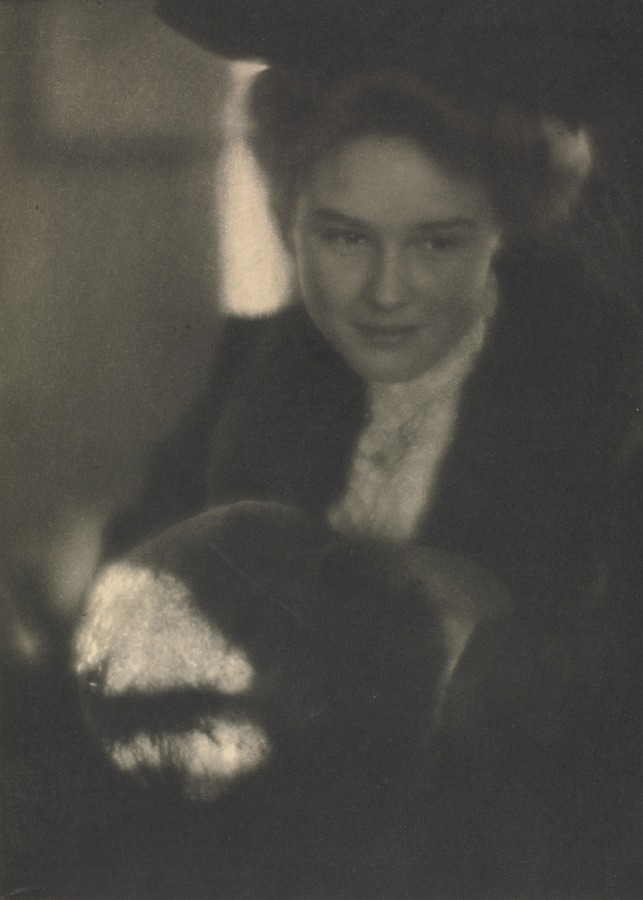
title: Camera Work: Portrait - Miss Mary Everett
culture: America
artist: Clarence H. White (American, 1871–1925)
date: 1908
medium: photogravure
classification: Bound Volume